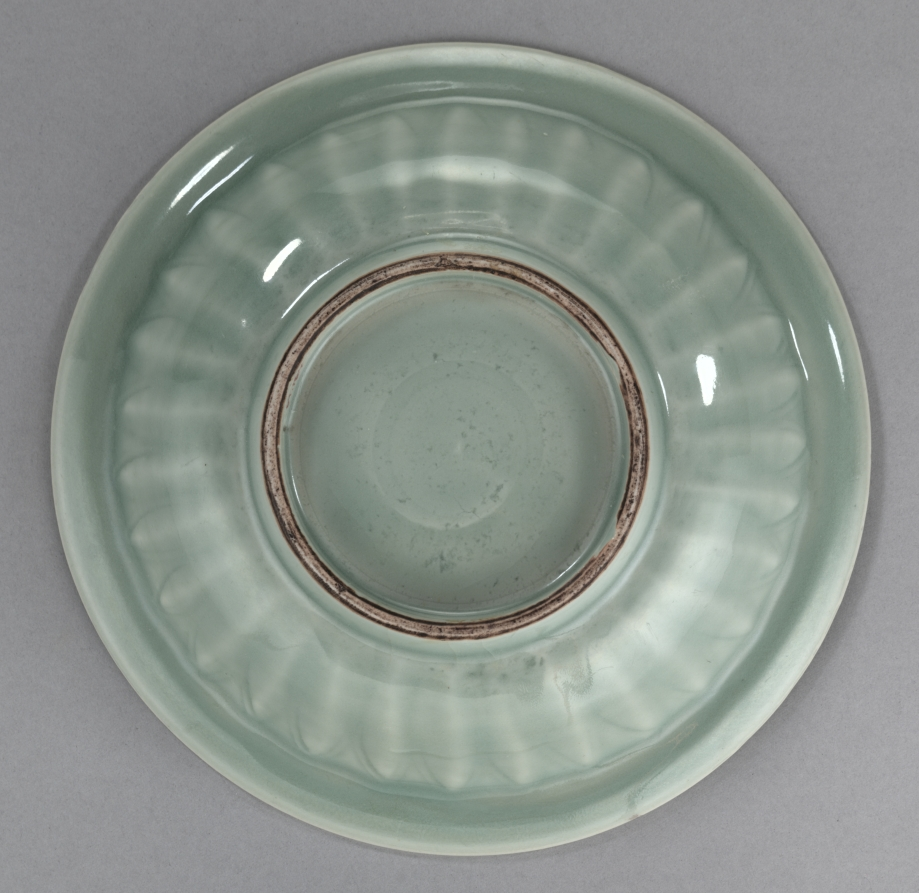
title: Dish with Two Fish in Relief: Longquan Ware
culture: China, Zhejiang province, Southern Song dynasty (1127-1279)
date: mid-1200s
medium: glazed porcelain with molded decoration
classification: Ceramic